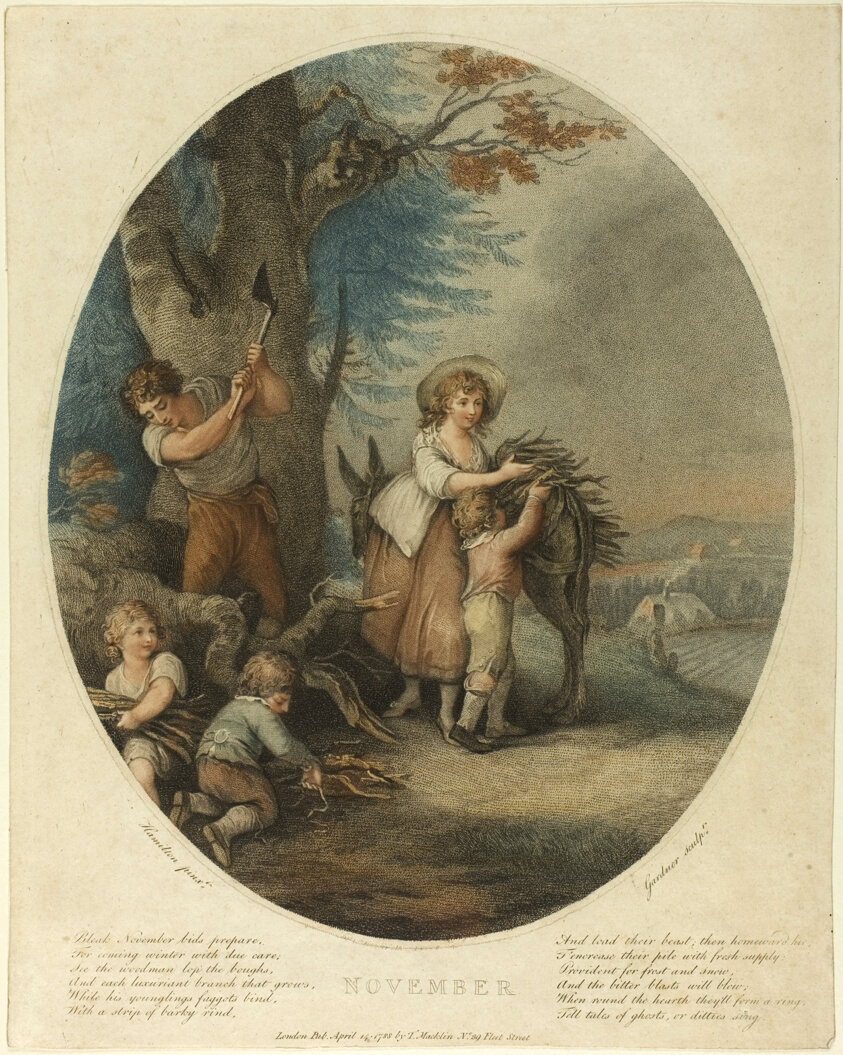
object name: Print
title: November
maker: William Nelson Gardiner (Irish, 1766-1814); after William Hamilton (English, 1751-1801)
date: April 14, 1788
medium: Color stipple engraving on paper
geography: Ireland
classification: engraving; print; prints and drawing